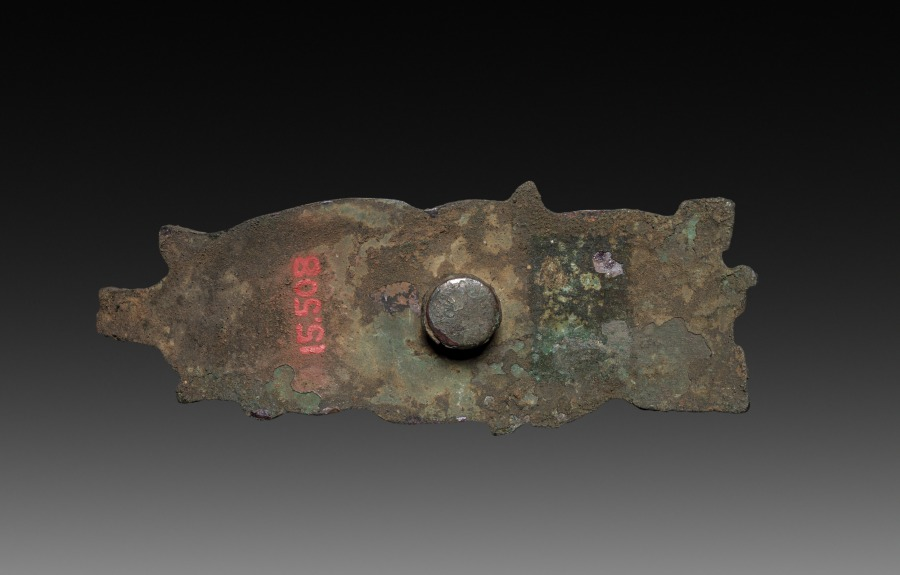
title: Clasp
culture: China, Tang dynasty (618-907)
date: 618–907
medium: bronze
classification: Jewelry